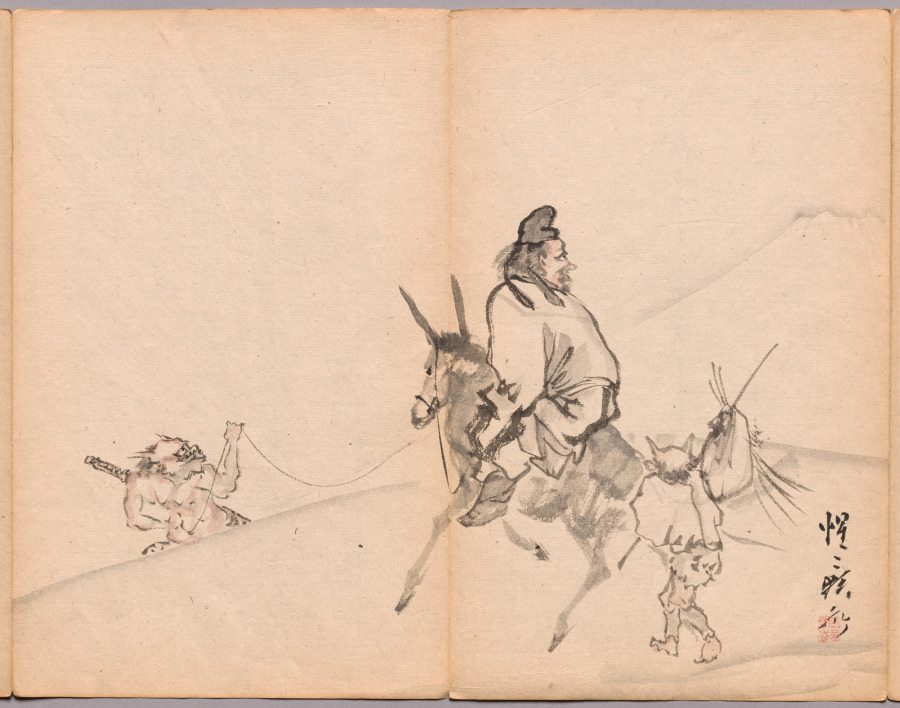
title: Zhong Kui from Sketch Album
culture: Japan, Edo period (1615–1868) to Meiji period (1868–1912)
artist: Kawanabe Kyōsai (Japanese, 1831–1889)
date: mid- to late 1800s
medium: Accordion-style book of 26 double-leaves; ink and color on paper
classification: Bound Volume